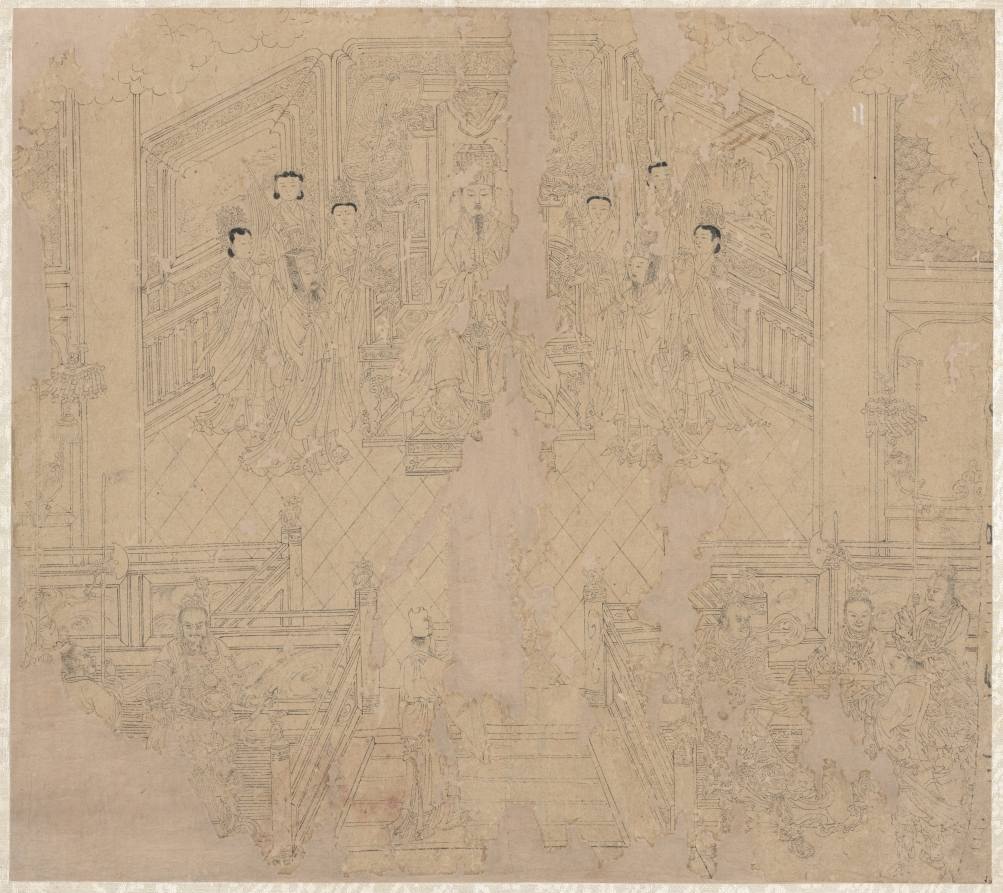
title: Album of Daoist and Buddhist Themes: Procession of Daoist Deities: Leaf 2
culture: China, Southern Song dynasty (1127-1279)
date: 1200s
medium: Album, ink on paper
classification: Painting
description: This extraordinary album has 50 paintings on a variety of religious subjects. They were likely created by several master craftsmen to share with studio apprentices as models for fulfilling commissions. The Jade Emperor and the Daoist pantheon make up the first 26 leaves. The next 14 leaves portray the Buddhist Ten Kings of Hell administering punishments to the dead. The third section, called “Clearing the Mountains,” features divine soldiers, led presumably by the deity Erlang Shen 二郎神, fighting undesirable creatures.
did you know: The Jade Emperor 玉帝 is surrounded by attendants.